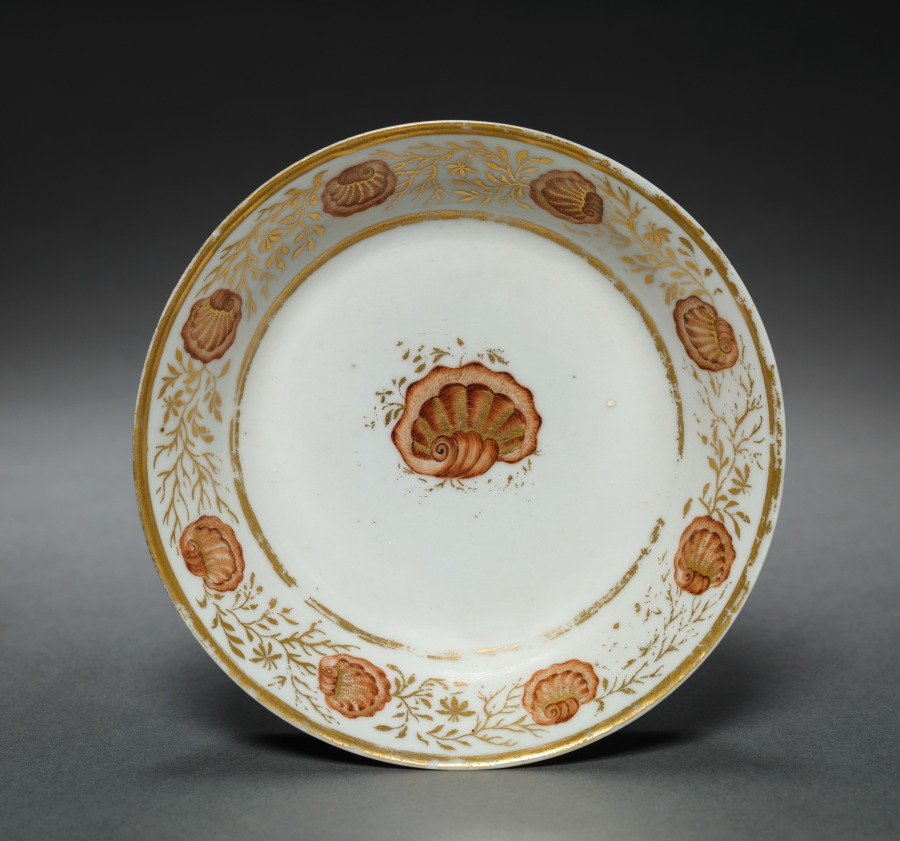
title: Saucer from Oliver Wolcott, Jr. Tea Service (5 of 6)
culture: Chinese Export porcelain, late 18th-early 19th century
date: 1785–1805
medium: porcelain, sepia enamel, gold leaf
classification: Ceramic